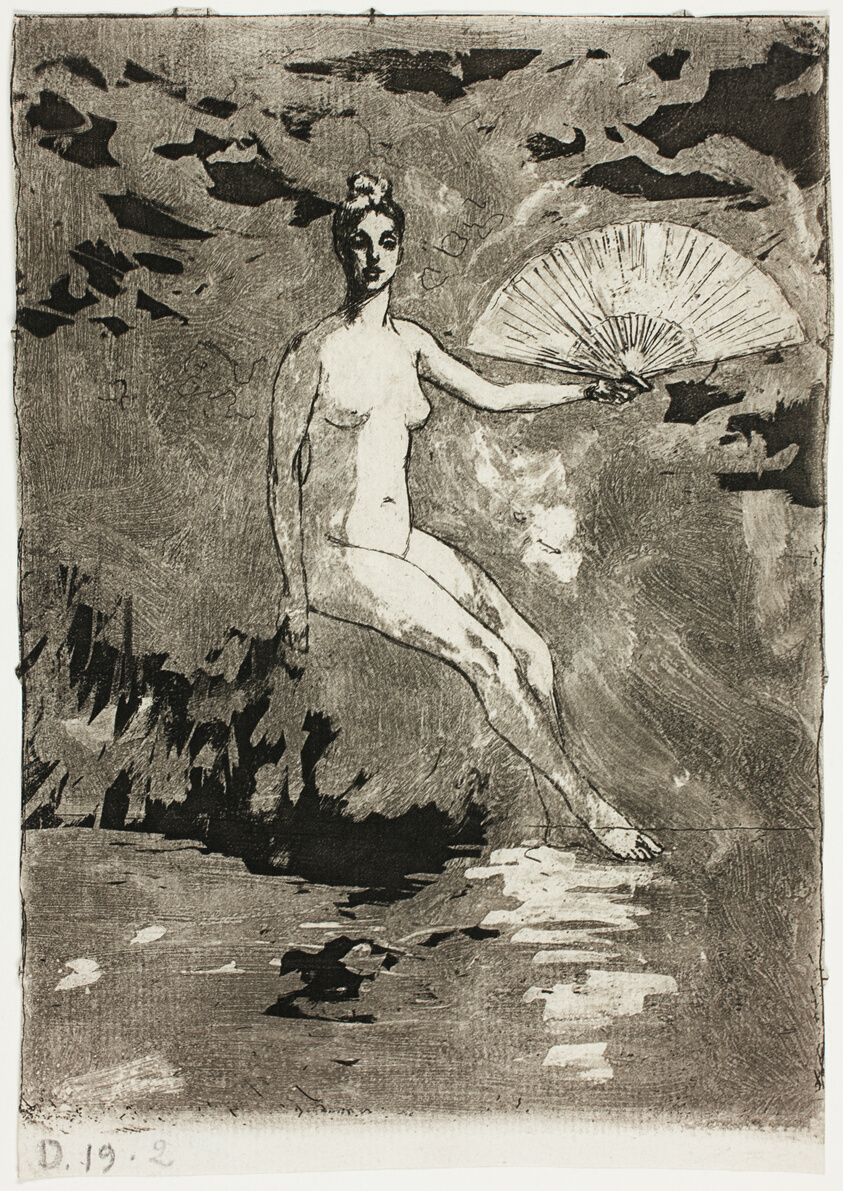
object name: Print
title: Summer (Color Version)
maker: Theodore Roussel (French, worked in England, 1847-1926)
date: 1890–1900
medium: Etching, aquatint and lavis in gray and black on ivory laid paper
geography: England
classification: etching; paper; print; prints and drawing